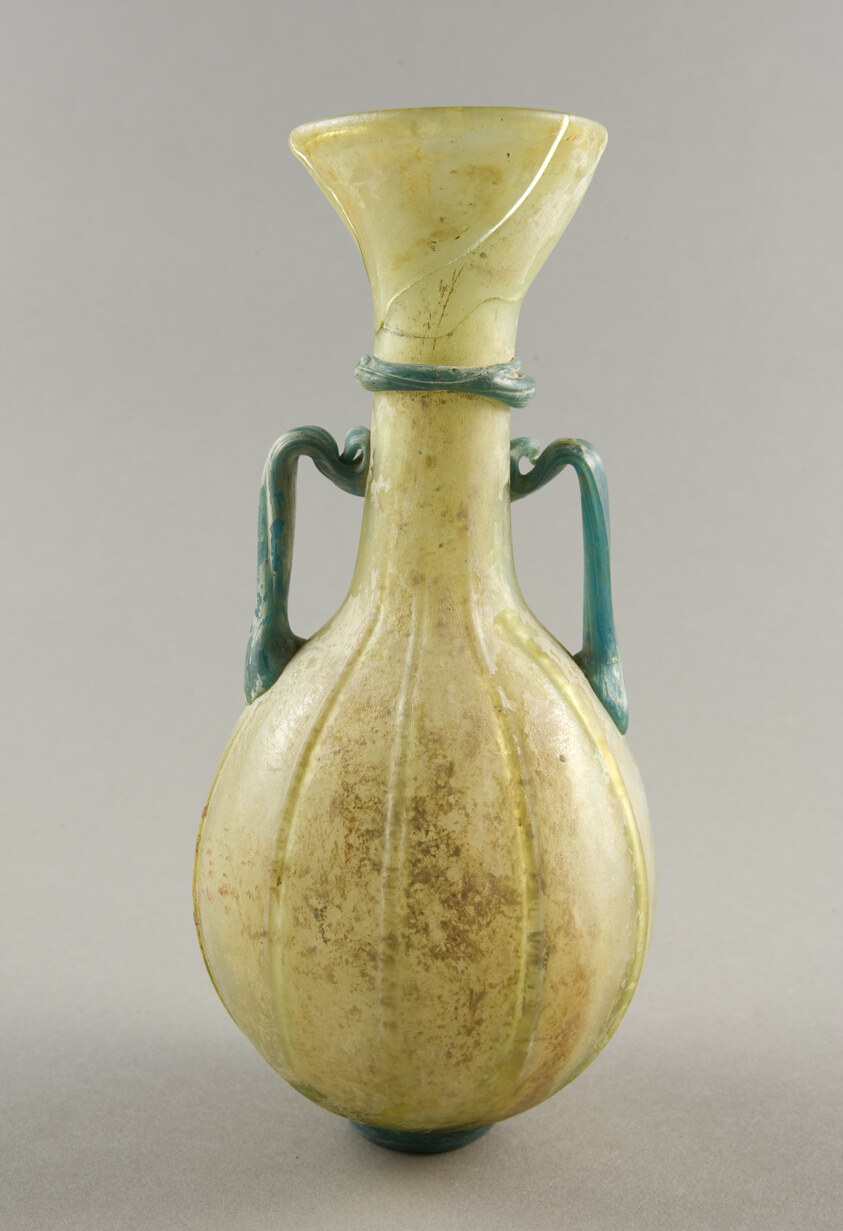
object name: Vessel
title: Flask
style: syrian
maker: Roman; Levant or Syria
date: mid–3rd-mid–4th century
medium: Glass, blown technique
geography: Syria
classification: glass; vessel; ancient art